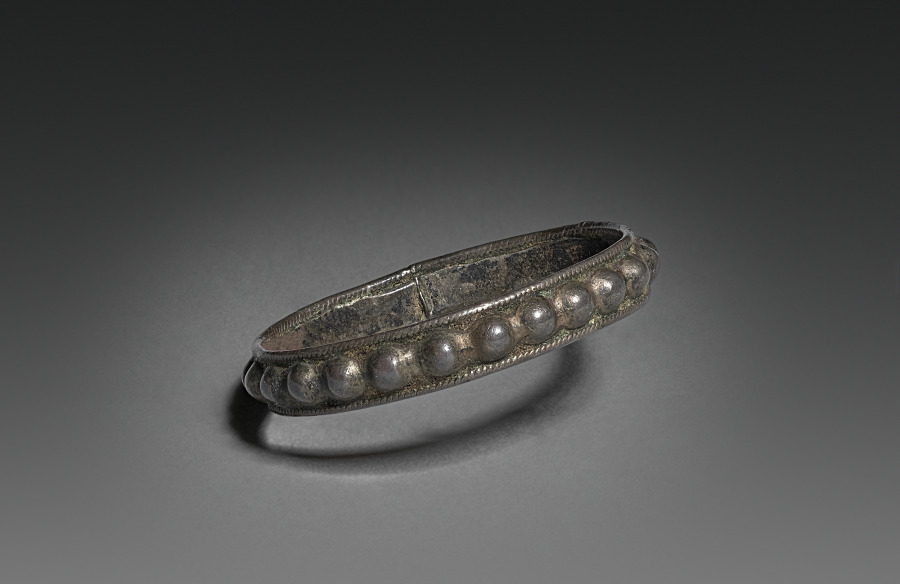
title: Ring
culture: India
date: 1800s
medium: silver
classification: Jewelry